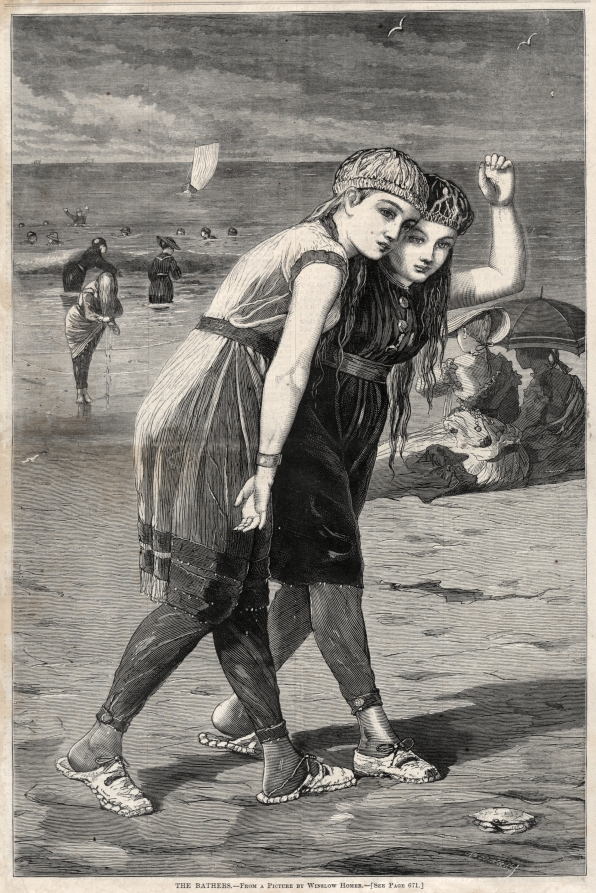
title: The Bathers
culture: America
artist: Winslow Homer (American, 1836–1910)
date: 1873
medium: wood engraving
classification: Print